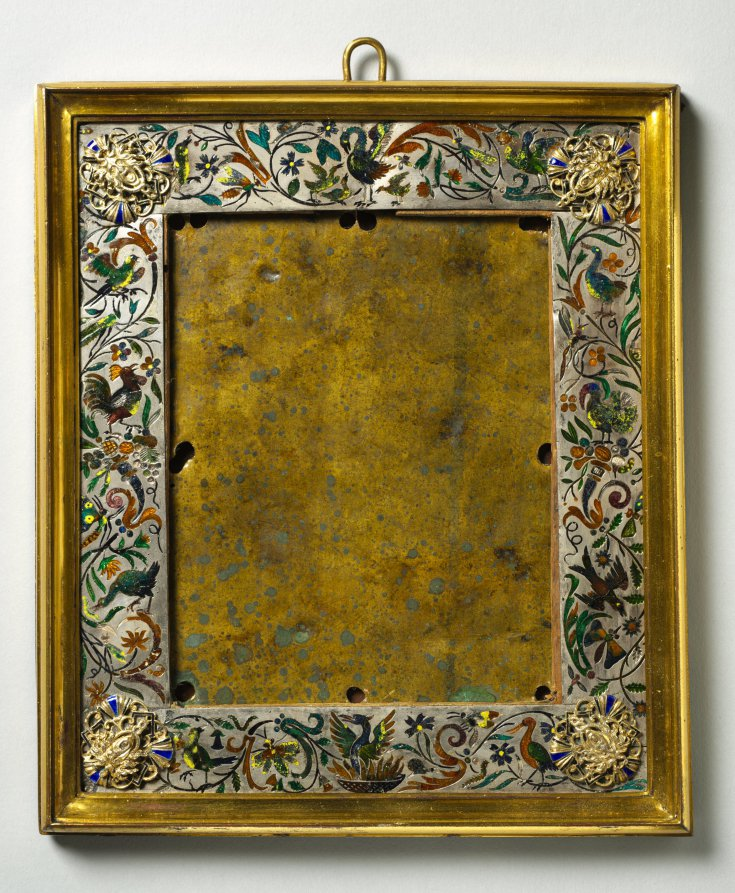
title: Frame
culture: Germany, Augsburg, 17th century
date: c. 1600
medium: glass, tortoise shell, silver enamel, gilt-bronze inner and outer frames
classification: Miscellaneous